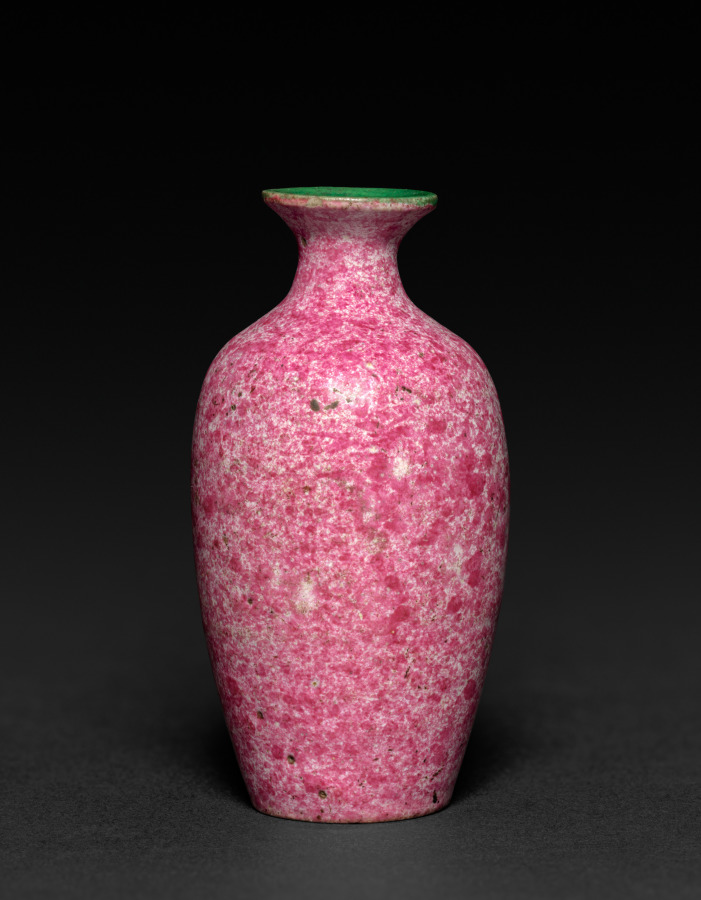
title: Miniature Vase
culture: China, Qing dynasty (1644–1911), Qianlong reign (1736–95)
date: 1736–95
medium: porcelain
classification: Ceramic